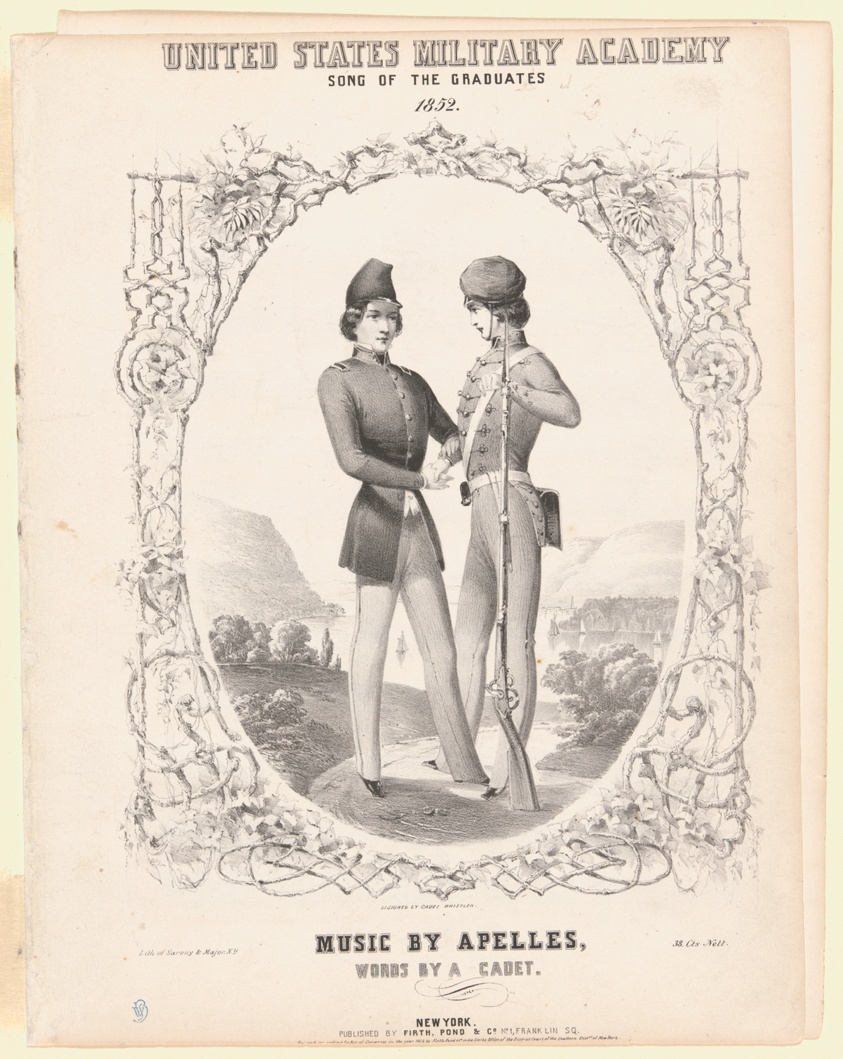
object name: Print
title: Design cover for West Point Song of the Graduates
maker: James McNeill Whistler (American, 1834-1903)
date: 1852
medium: Transfer lithograph in black on off-white wove paper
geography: United States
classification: transfer lithograph; lithograph; print; prints and drawing; paper